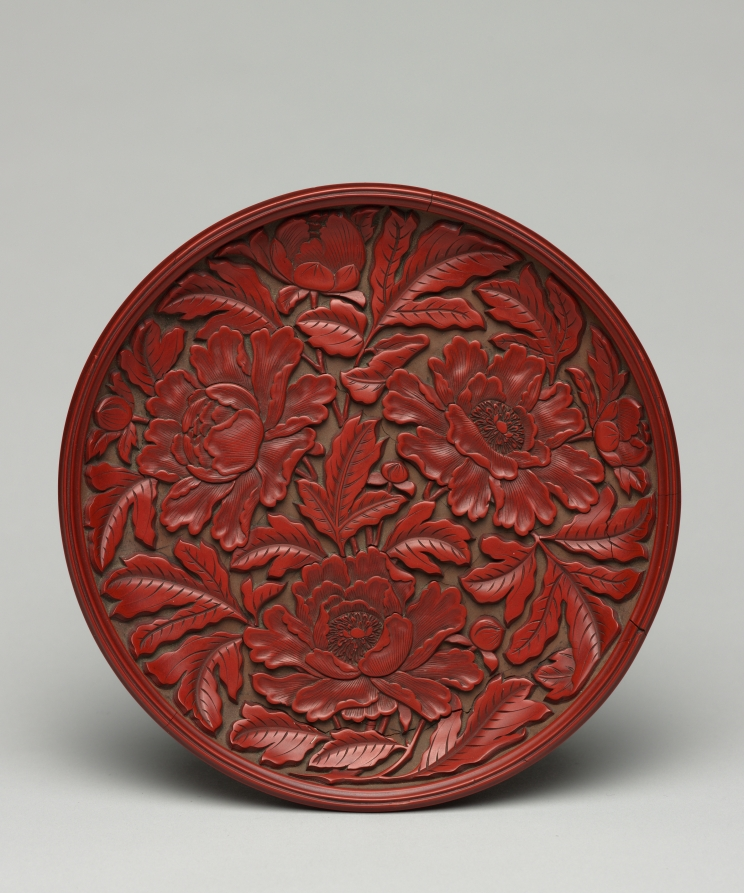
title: Plate with Peony Decoration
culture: China, Yuan dynasty (1271-1368)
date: late 1300s–early 1400s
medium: carved cinnabar lacquer on wood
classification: Lacquer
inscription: Signature incised on bottom: Yang Mao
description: This lacquer dish of strikingly deep red color is decorated with a dynamically carved design of three peony blossoms. Because of the complexity in lacquer production, items are often small and were seldom made for daily use. Lacquer was traditionally made using the sap of the lacquer tree found in southern China. Many successive layers of lacquer would be applied until the surface could be carved into complex geometric or figural forms. Red became the preferred color for lacquerware carvings, in part because the color has long been associated with good fortune in China.